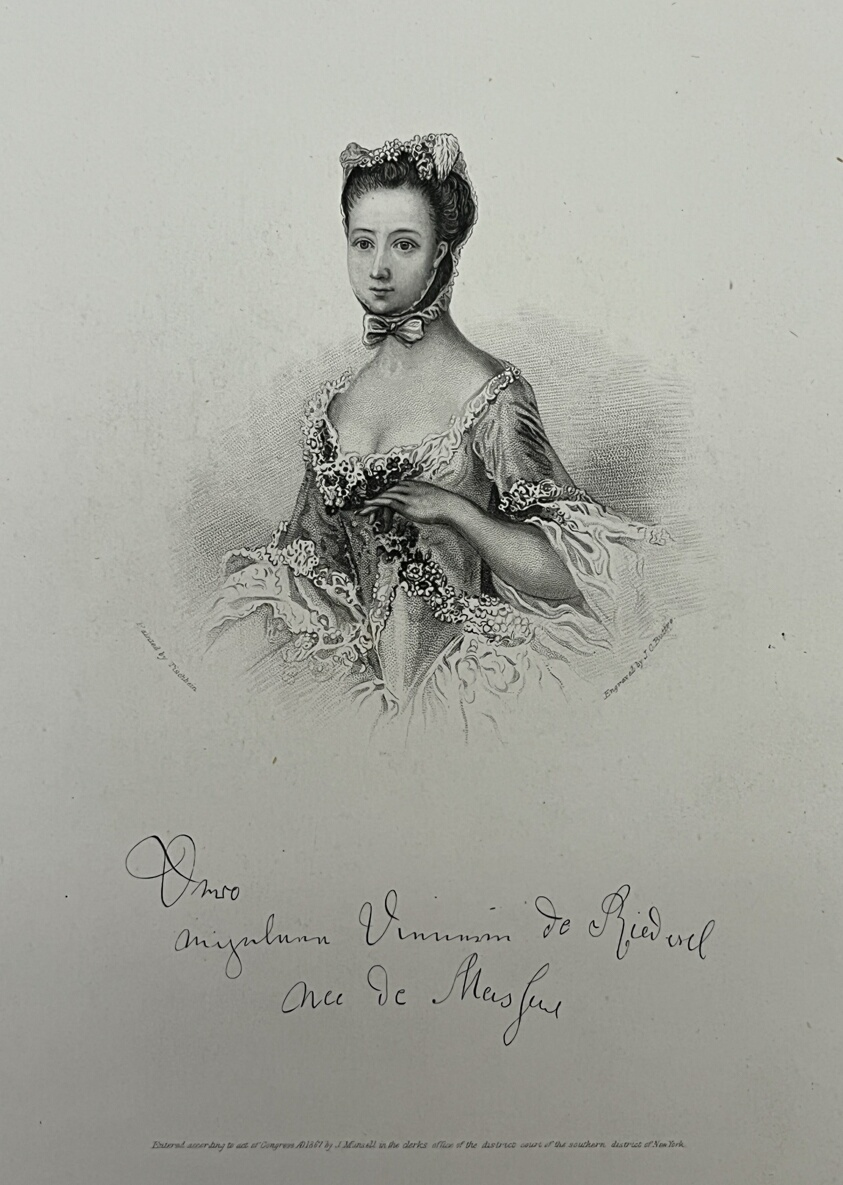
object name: Print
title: Frederika Charlotte Louise von Massow, Baroness (Freifrau) Riedesel zu Eisenbach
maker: John Chester Buttre (American, 1821-1893); after Johann Friedrich August Tischbein (German, 1750-1812)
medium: Stipple engraving on paper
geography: United States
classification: reproduction; print; prints and drawing